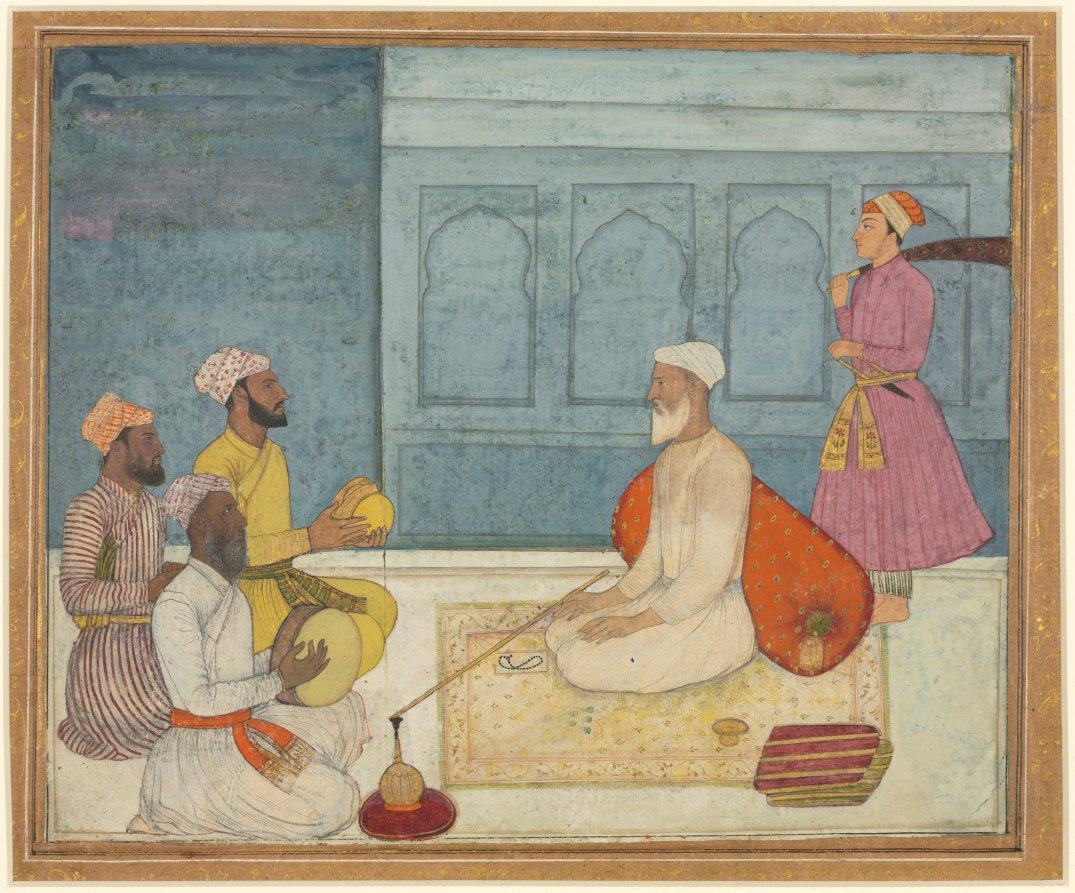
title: Sultan and Musicians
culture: Mughal India, Deccan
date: c. 1650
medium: Gum tempera and gold on paper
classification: Painting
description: The tone-on-tone pale mustard-yellow carpet and orange floor cushion furnish the terrace with a seat of honor for the figure dressed in white. The peacock-feather whisk held by an attendant behind him is an emblem of his royal status. Lying conspicuously before his knees, Muslim prayer beads mark him as a man of piety. He also partakes in courtly pleasures of hookah smoking and paan chewing. Green triangular paan packets consist of betel nut, lime, and flavorful aromatics such as cinnamon or coconut, wrapped in betel leaf. A brass spittoon by his side would be used for spitting throughout the enjoyable process of chewing the packets.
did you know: The two singers with open mouths may be performing a work by a mystic of the Sufi branch of Islam, given the essential role of music in Sufism and the pious mood of the all-male gathering.